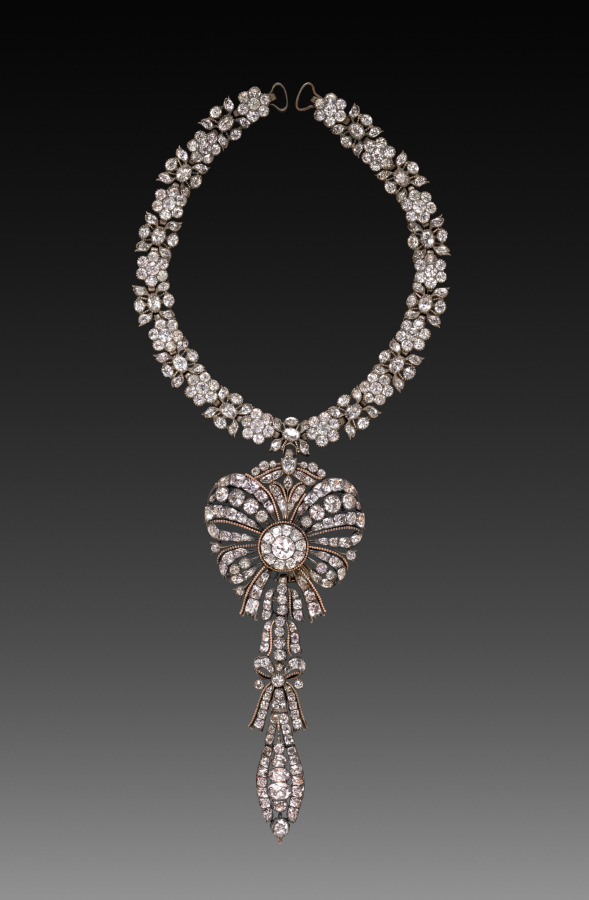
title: Necklace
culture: England or France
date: c. 1775–95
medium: gold, silver and brilliants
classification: Jewelry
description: Throughout the 1700s, the growing trade for personal luxury objects transformed the material culture surrounding marriage and courtship. Gifts such as perfume, sheet music, books, textiles, portrait miniatures, and jewelry often demonstrated the status of the gift giver and their investment in the relationship. While intended to be seen and admired, this glittering and ostentatious necklace disguised a system based on the labor and suffering of enslaved or indentured people, whether in gold and stone mines or the shop where it was made.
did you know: This type of necklace, with its single large pendant, is known as a lavalier and was popular among aristocratic women during the 1700s. Queen Charlotte, wife of George III, was known to have several necklaces of this type.